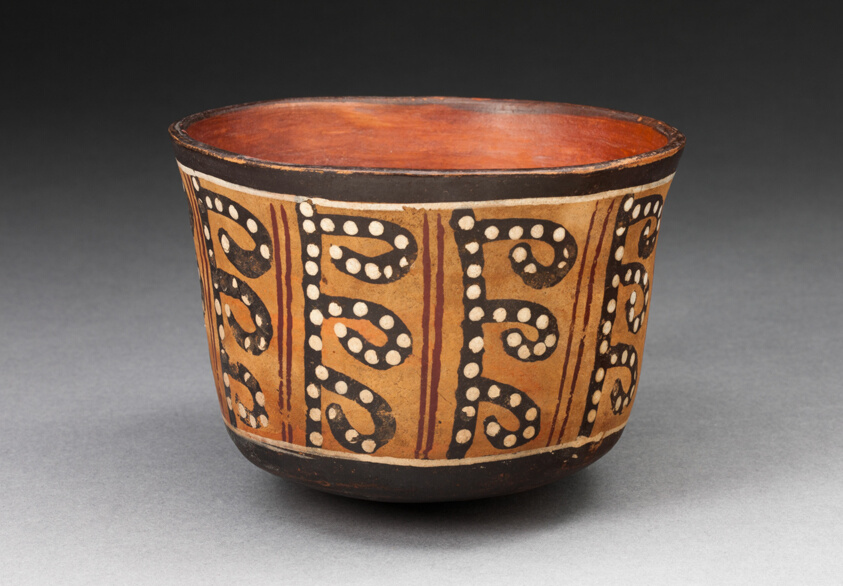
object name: Vessel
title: Cup with Repeated Spotted, Curved Line Motif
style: nazca, early intermediate period, Pre-Columbian, americas, Arts of the Americas, andean, andes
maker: Nazca; South coast, Peru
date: 180 BCE–500 CE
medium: Ceramic and pigment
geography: Nazca Valley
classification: earthenware; art of the americas; ceramics; vessel